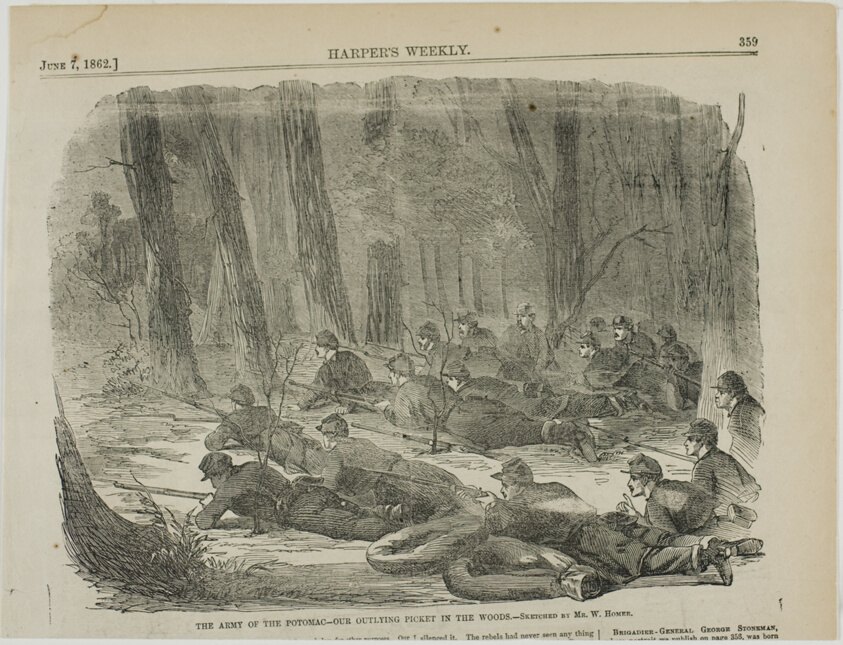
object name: Print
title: The Army of The Potomac—Our Outlying Picket in the Woods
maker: Winslow Homer (American, 1836-1910); published by Harper's Weekly (American, 1857-1916)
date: published June 7, 1862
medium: Wood engraving on paper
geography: United States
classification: wood engraving; print; prints and drawing